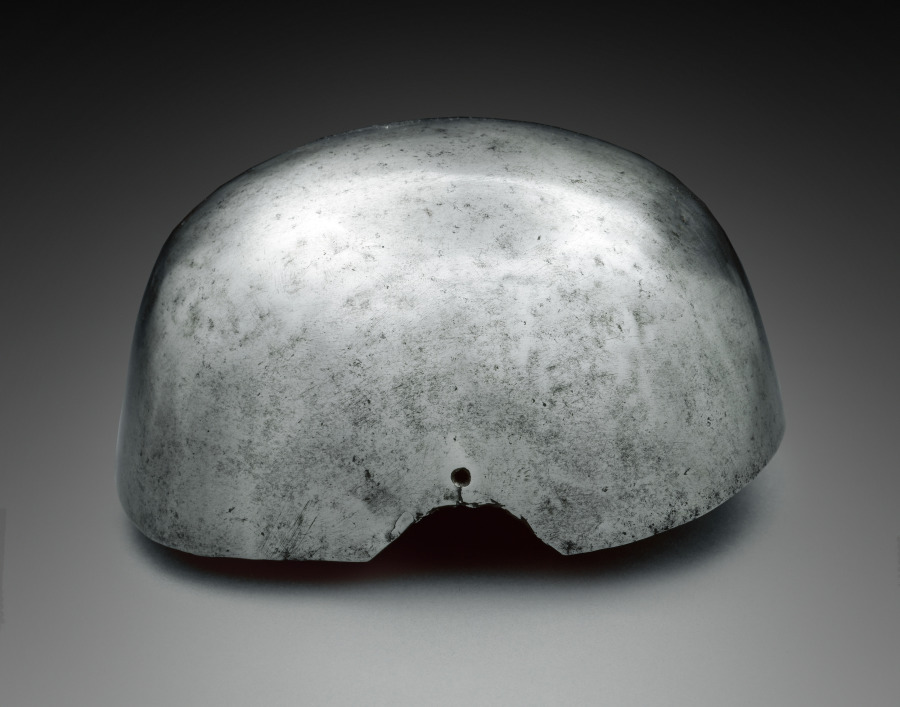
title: "Secrete" or Skull Cap (Hat Lining)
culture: England (?), 17th century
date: c. 1630–50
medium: steel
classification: Arms and Armor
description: Metal skullcaps, for wear under a hat, allowed the owner invisible protection against edged weapons. They were worn by both soldiers and civilians.